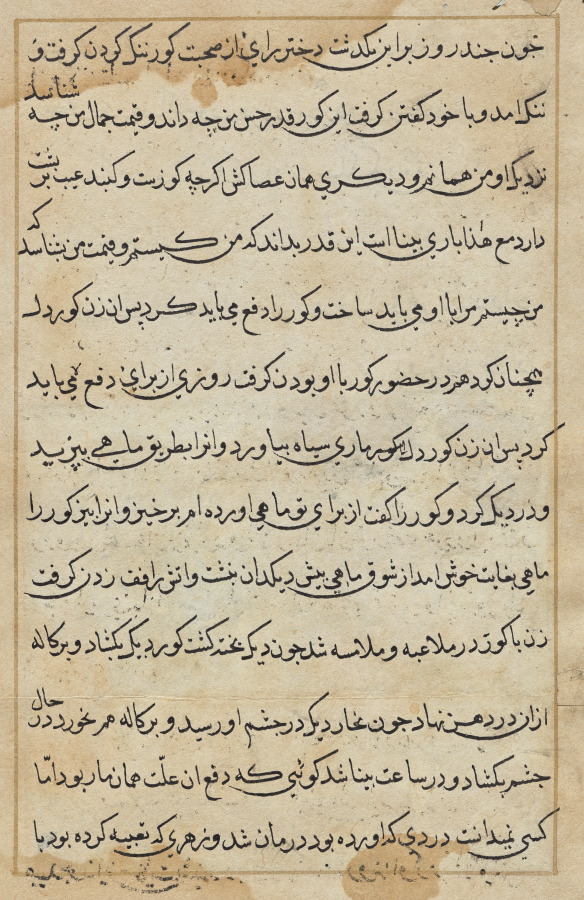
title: Page from Tales of a Parrot (Tuti-nama): text page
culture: Mughal India, court of Akbar (reigned 1556–1605)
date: c. 1560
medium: gum tempera, ink, and gold on paper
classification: Painting